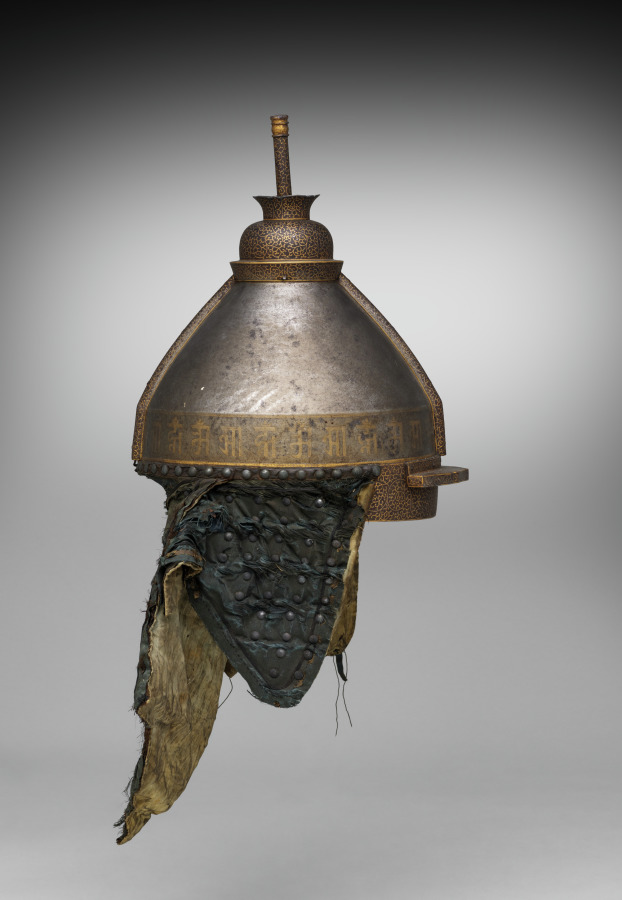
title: Helmet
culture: Sino-Tibetan, Ming dynasty (1368-1644)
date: 1368–1644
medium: iron inlaid with gold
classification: Arms and Armor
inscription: Tibetan inscription